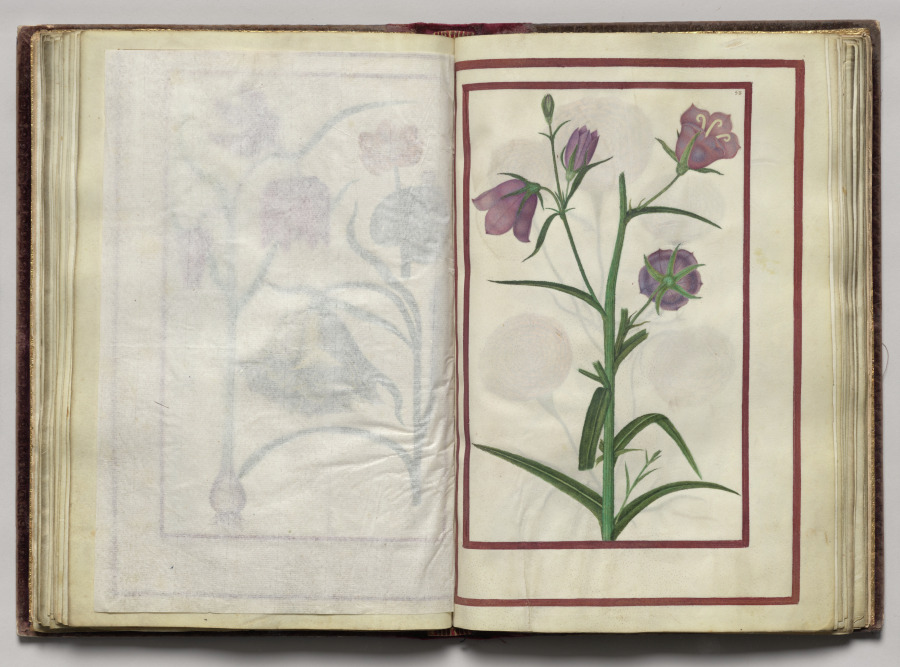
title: Florilegium (A Book of Flower Studies)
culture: France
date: 1608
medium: bound manuscript of 48 leaves, 77 drawings; watercolor, ink, silver, and gold over occasional traces of pencil, on vellum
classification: Bound Volume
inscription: Dated: Poitiers 1608 (on frontispiece) Signed: On frontispiece in black ink, lower right: Van Kuyk Notation on drawing: Frontispiece: in pencil, lower margin: * élève de Van Kessel, peintre flammand (* in pencil also appears in front of Van Kuyk's name).